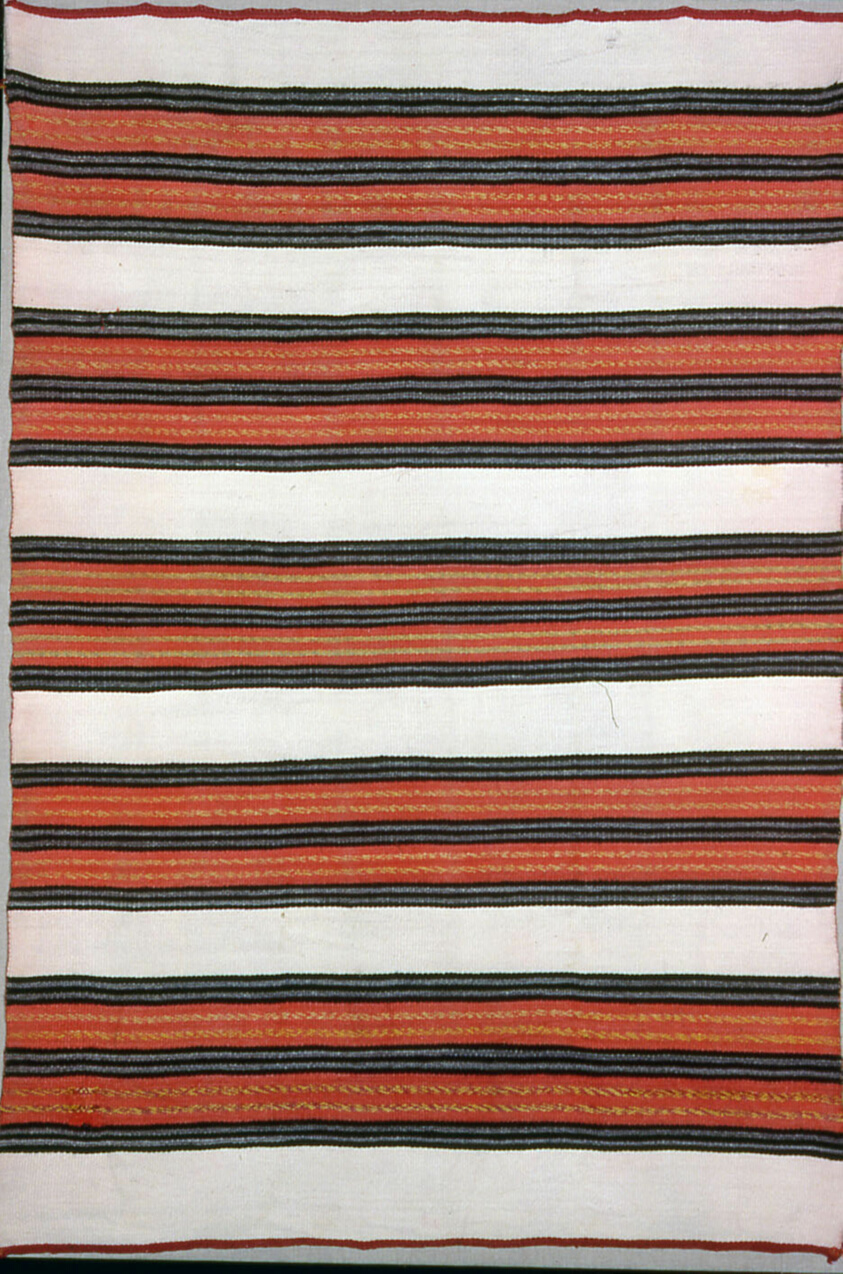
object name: Textile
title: Blanket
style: pueblo, native american, americas, navajo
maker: Probably Pueblo; Southwest, United States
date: 1851/1900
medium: Wool, weft-faced, weft band plain weave; twined selvages, heading and finish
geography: Southwest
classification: textile; weaving